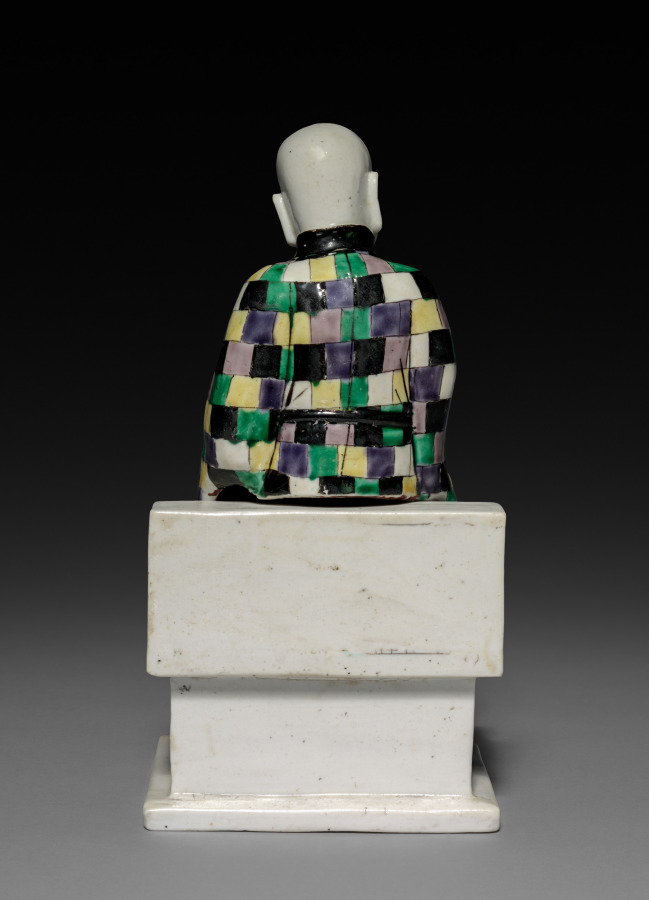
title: Lohan (Arhat) Holding a Peach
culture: China, Jiangxi province, Jingdezhen kilns, Qing dynasty (1644–1911), Kangxi reign (1662–1722)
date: 1662–1722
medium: porcelain with famille verte overglaze enamel decoration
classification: Ceramic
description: Lohan are disciples of Buddha with supernatural powers and eccentric behaviors. This lohan is holding the peach of longevity (shoutao), while its mate is holding the fu-dog, symbolizing good luck. With carefree smiles and playful gestures, these two figures embody a humorous attitude and a detachment from worldly affairs. This pair of porcelain figures was perhaps part of a house altar set or a decorative item in a household.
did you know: This lohan with a bald head wears a monk’s robe made of patches.